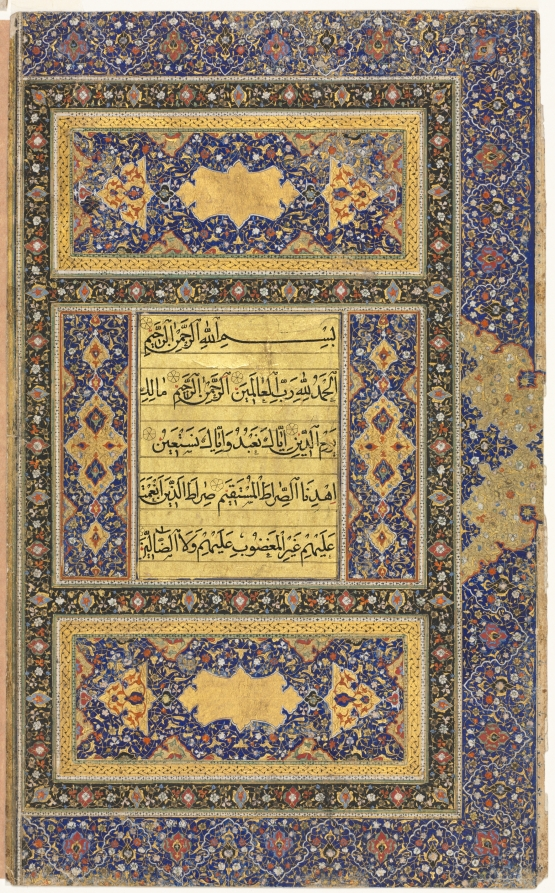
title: Qur'an Manuscript Folio (Verso); Right folio of Double-Page Illuminated Frontispiece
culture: Afghanistan, Herat, Safavid period (1501–1722)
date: 1500s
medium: ink, gold, and colors on paper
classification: Manuscript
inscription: Translation: Surah I: 1-7: In the Name of God, the Merciful, the Compassionate. Praise belongs to God, the Lord of all Being, the All merciful, the All-compassionate, the Master of the Day of Doom Thee only do we serve; to Thee alone do we pray for succour. Guide us in the straight path, the path of those whom Thou has blessed, not of those against whom Thou art wrathful, nor of those who are astray. Left folio (Surah II, 1-4) In the Name of God, the Merciful, the Compassionate. Alif Lam Mim That is the book, wherein is no doubt, a guidance to the godfearing who believe in the Unseen, and perform the prayer, and expend of that We have provided them; who believe in what has been sent down to thee and that had been sent down before thee, and have faith in the Hereafter; those are upon guidance from their Lord, those are the ones who prosper. Sura al-Fatiha [Chapter: The Opening] 1:1-7 (Arabic) Script: Naskhi (five lines to a page)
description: The Qur'an is the sacred book of Islam. In the view of orthodox Muslims, it is the literal word of God as revealed to the Prophet Muhammad (d. 632) in the Arabic language, and thus, recorded in the Arabic script. Because of its association with the divine word, Arabic calligraphy came to be a supreme art form in the Islamic world. As the quintessential symbol of the culture, it became a pervasive decorative element in Islamic art and architecture. Although secondary to calligraphy, a splendid tradition of illumination—that is, ornamentation with colors and gold—developed to enhance the pages of the Qur'an. Because of the prestige associated with the book arts in the Islamic world, the decorative motifs employed by illuminators (scrolling vines, blossoms, lozenges, and cartouches) found their way into other art forms, for example, metalwork, textiles, and carpets.